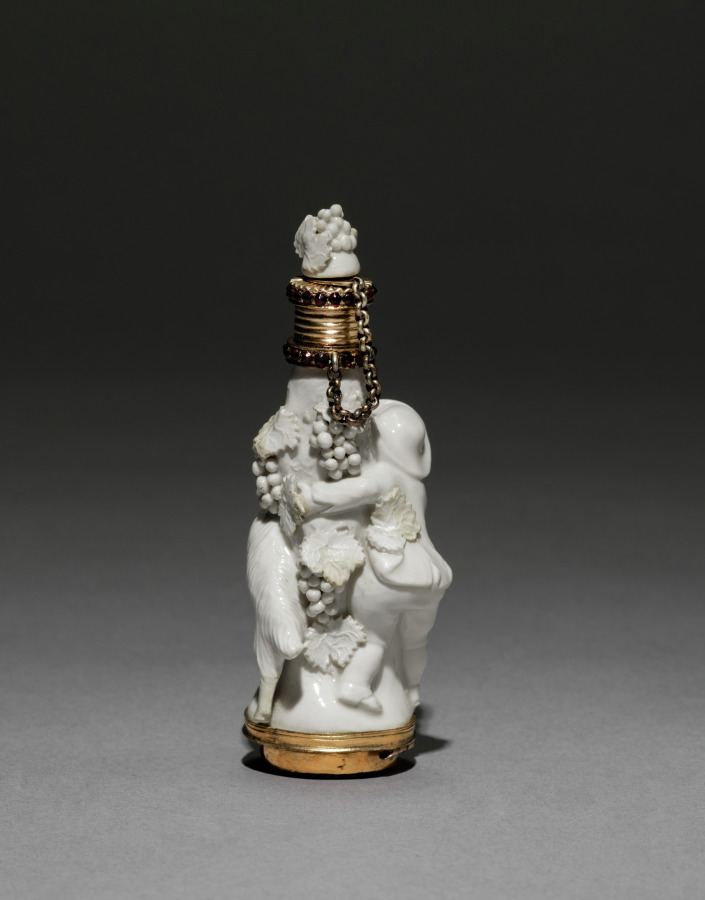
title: Scent Bottle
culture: England, Chelsea, mid-18th century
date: mid 1700s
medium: soft-paste porcelain with gilt metal mounts set with red faceted stones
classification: Miscellaneous